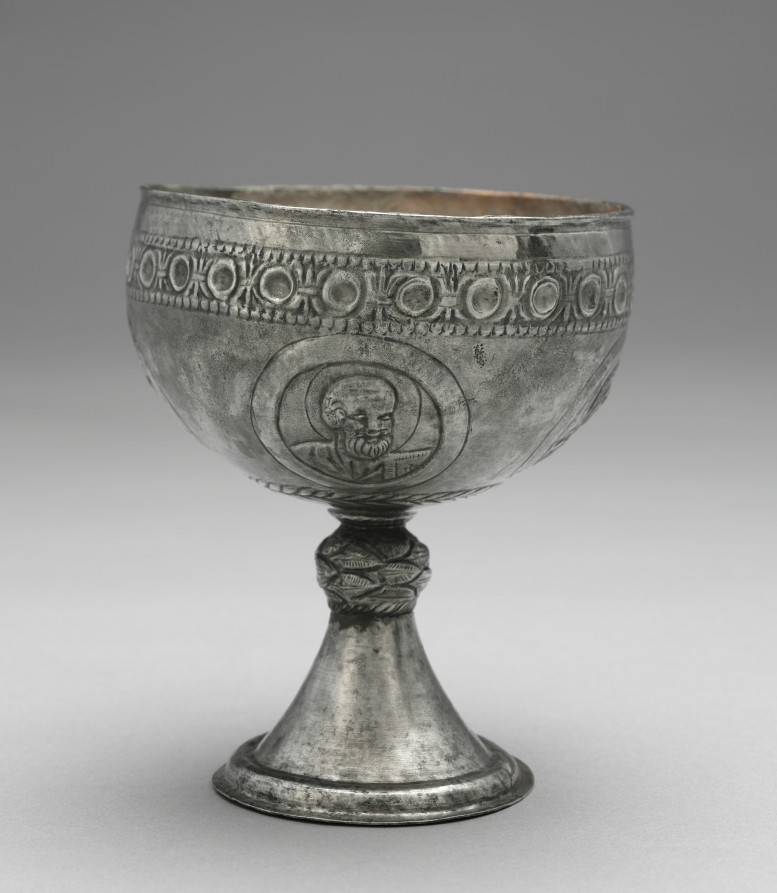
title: Chalice from the Beth Misona Treasure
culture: early Byzantium, Constantinople or Syria, Byzantine period, 6th-7th Century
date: c. 500–700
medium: silver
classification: Metalwork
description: These four liturgical silver vessels—a paten and three chalices (1950.378–81)—form what is now called the Beth Misona Treasure, named for the village in northern Syria for which the objects were made. While nothing is known about the exact location and circumstances of the treasure's discovery, the people of the village of Beth Misona were, like other Christian communities in Syria and Palestine, probably forced to bury their church silver to hide it from the Persians or Arabs, who conquered their lands in the first half of the 600s. The paten, which held pieces of Eucharistic bread used during Mass, is decorated with an engraved Latin cross surrounded by a dedicatory inscription that names the paten's donor—Domnos—and its original location, the church of Saint Sergios in Beth Misona. The chalices, which contained the Eucharistic wine used during Mass, feature broad cups decorated with portrait busts of Saints Peter and Paul, Christ, and the Virgin. One chalice bears a dedicatory inscription naming its donor—Kyriakos, Domnos's son—and the priest of the church that received the pious gift—Zeno.